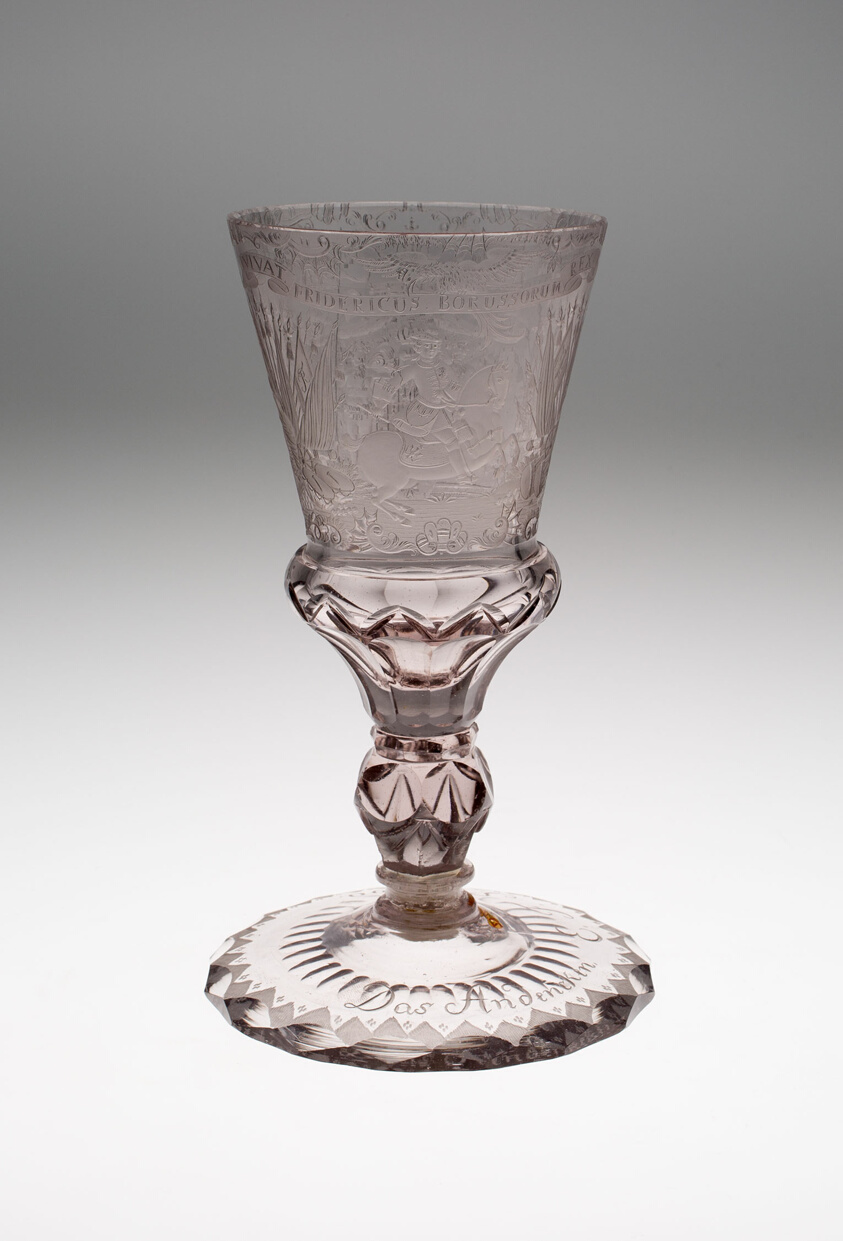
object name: Glass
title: Goblet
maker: Germany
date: c. 1755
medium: Glass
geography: Germany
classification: drinking vessel; glass; european decorative arts